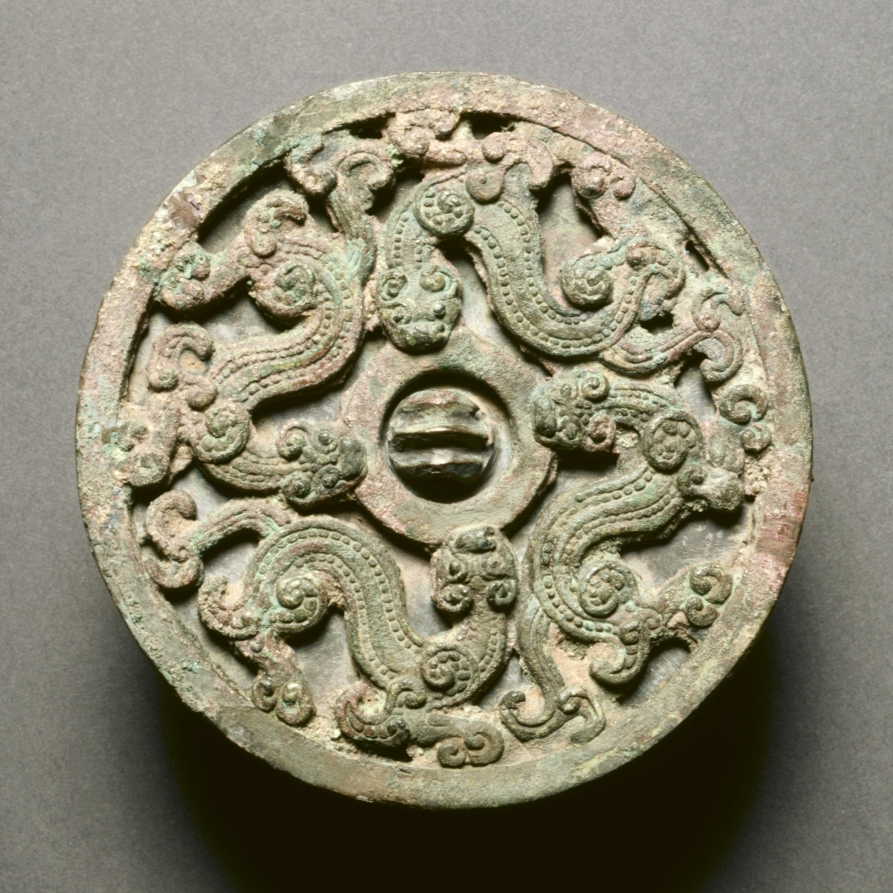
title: Double-tier Mirror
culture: China, Warring States period (475–221 BCE)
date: 300s BCE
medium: bronze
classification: Metalwork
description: The craft of mirror making prospered remarkably during the Warring States period, as bronzes increasingly served as luxury items for individuals. A variety of ornamentations appear on the backs of mirrors, some of which bear resemblance to those found in contemporary jades, lacquer wares, and textiles—all luxury items of the day. This tiny round mirror belongs to the rare double-cast type. It consists of two different layers: a reflective disc with a central knob at the back, and a ring with openwork designs of undulating serpents.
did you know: This luxury object consists of two different layers: a reflective disc with a central knob on the back, and a ring with openwork serpent designs.